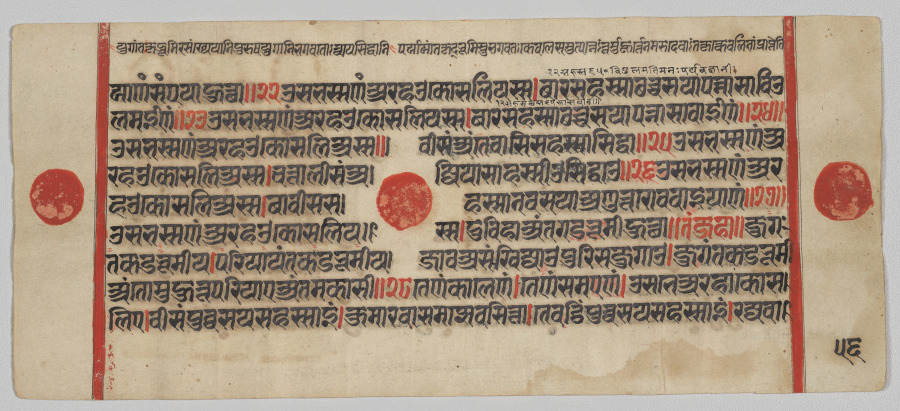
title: Text, Folio 56 (verso), from a Kalpa-sutra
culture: Western India, Gujarat, last quarter of the 15th century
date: c. 1475–1500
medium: Gum tempera, ink, and gold on paper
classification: Painting